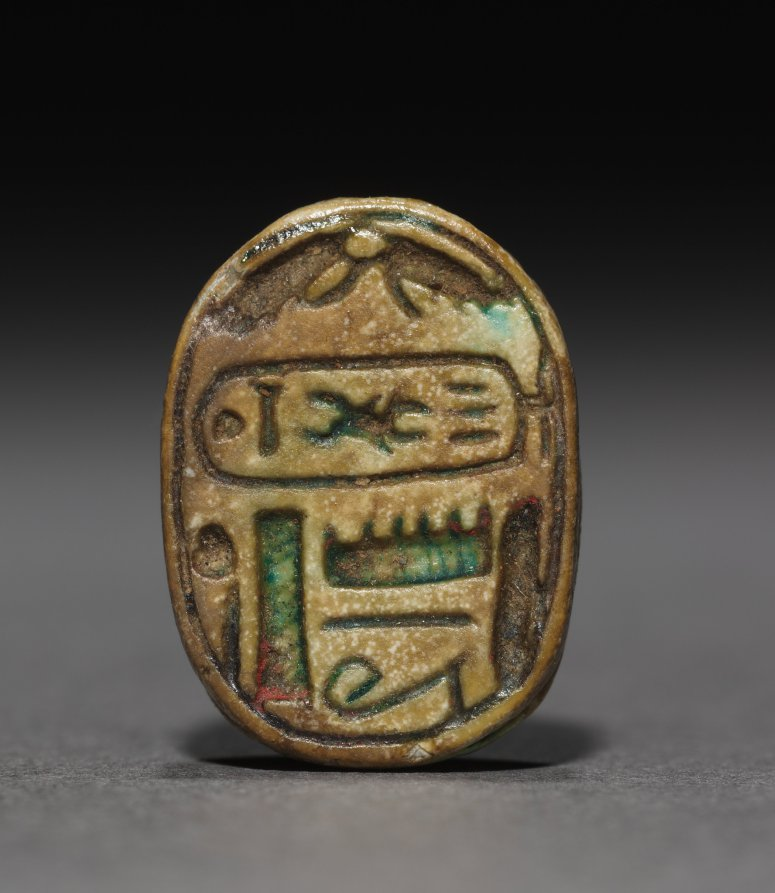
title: Amenhotep II Scarab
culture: Egypt, New Kingdom or modern forgery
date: 1550–1077 BCE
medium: steatite, traces of turquoise glaze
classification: Scarabs